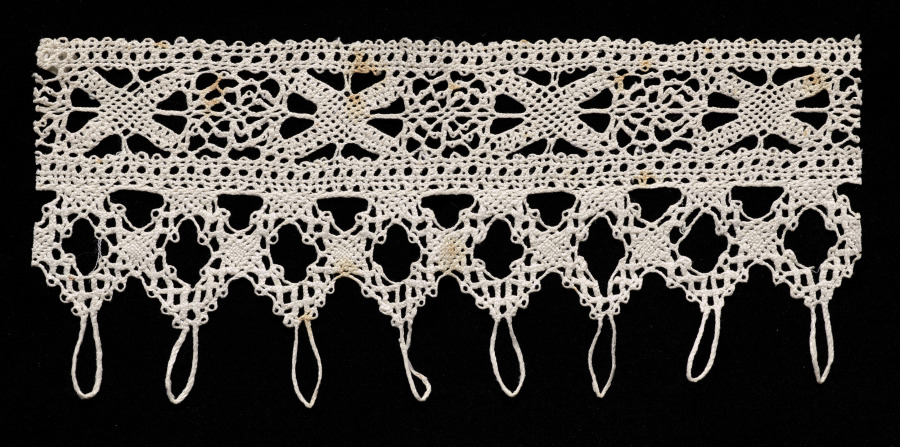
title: Lace Insertion and Edging with Loops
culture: Italy, Venice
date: 1540–60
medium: Bobbin lace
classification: Lace